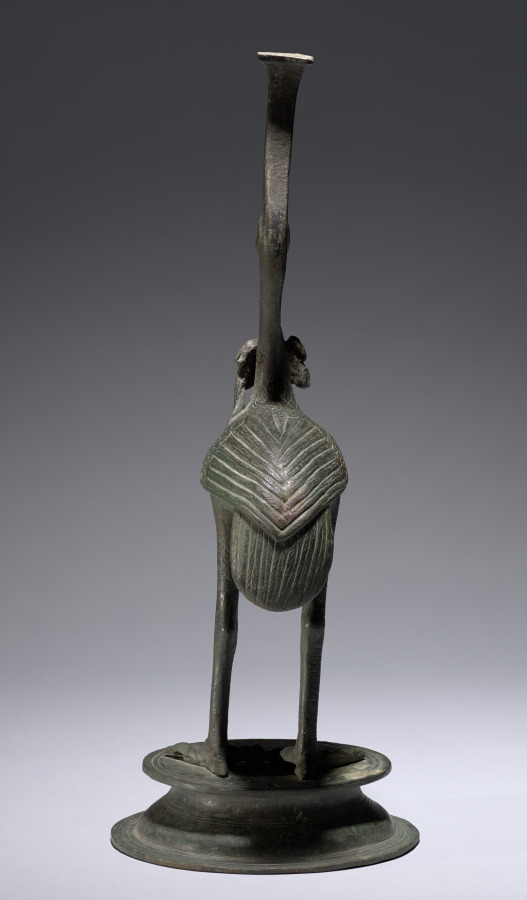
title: Ibis Eating a Lizard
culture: Italy, Rome, Roman Empire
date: 100 BCE–100 CE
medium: bronze, hollow cast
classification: Sculpture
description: The ibis is an Egyptian bird, shown here standing firmly on both legs with a lizard in its beak. The bird rests on a two-tiered circular base, and a vertical stem with incised decoration extends above the ibis’s head. While an Egyptian animal, the image of the ibis devouring a lizard became common only in the Roman world, depicted in wall paintings and seen on Barbotine ware, a type of pottery. This sculpture may be unique, however, in showing this motif in the round.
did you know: This sculpture was possibly used as a support for furniture, a candelabrum, or an incense burner.